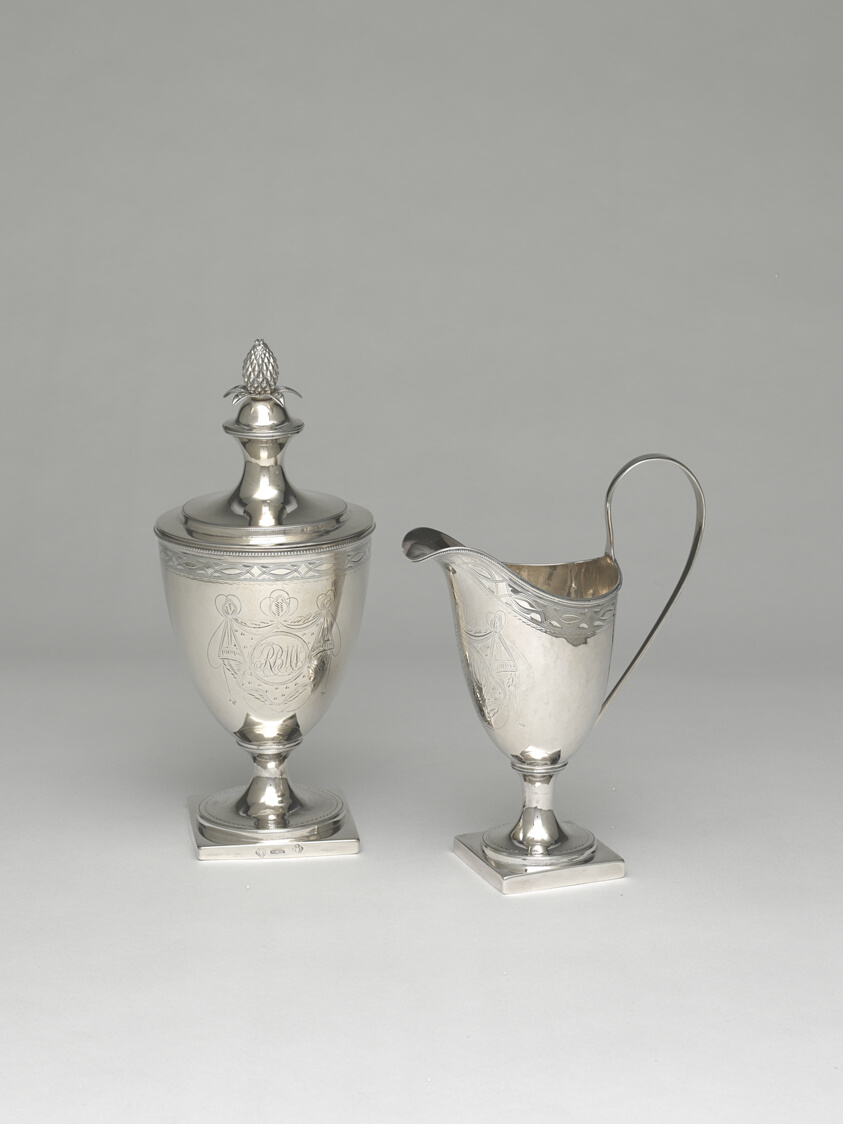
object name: Metalwork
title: Sugar Urn and Cream Pot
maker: Daniel Van Voorhis; American, 1751–1824; New York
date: c. 1793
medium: Silver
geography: New York City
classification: sugar bowl; creamer; silver; american decorative arts; american arts; decorative arts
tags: dining, drinking